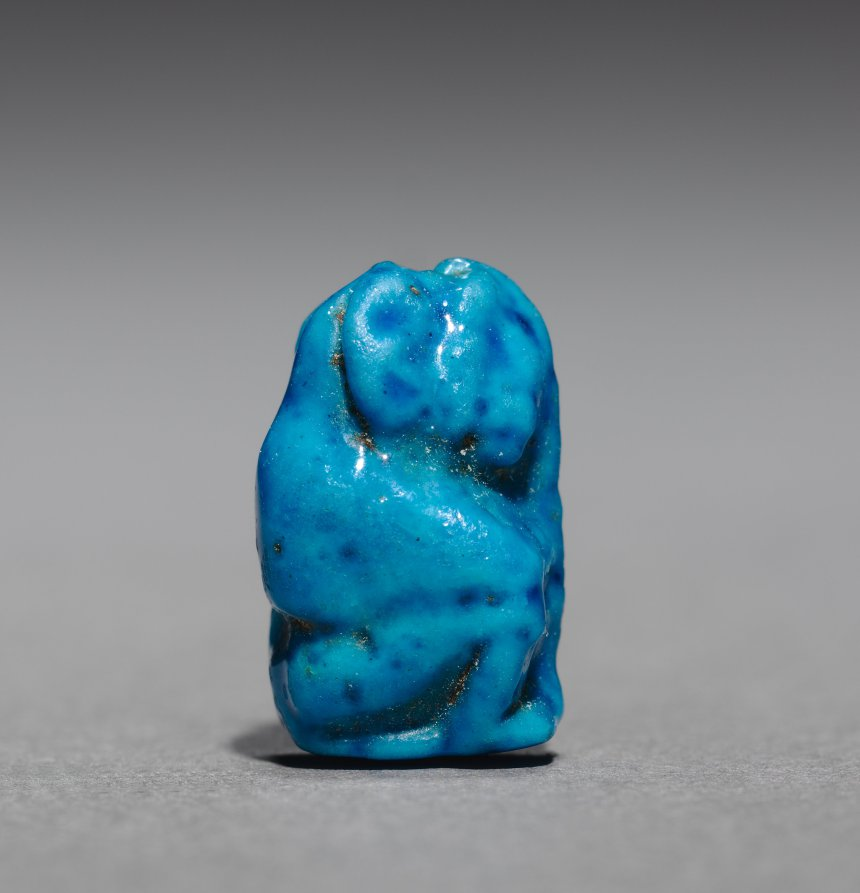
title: Hamadryas Baboon Amulet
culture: Egypt, New Kingdom (1540–1069 BCE)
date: 1540–1069 BCE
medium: faience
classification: Amulets